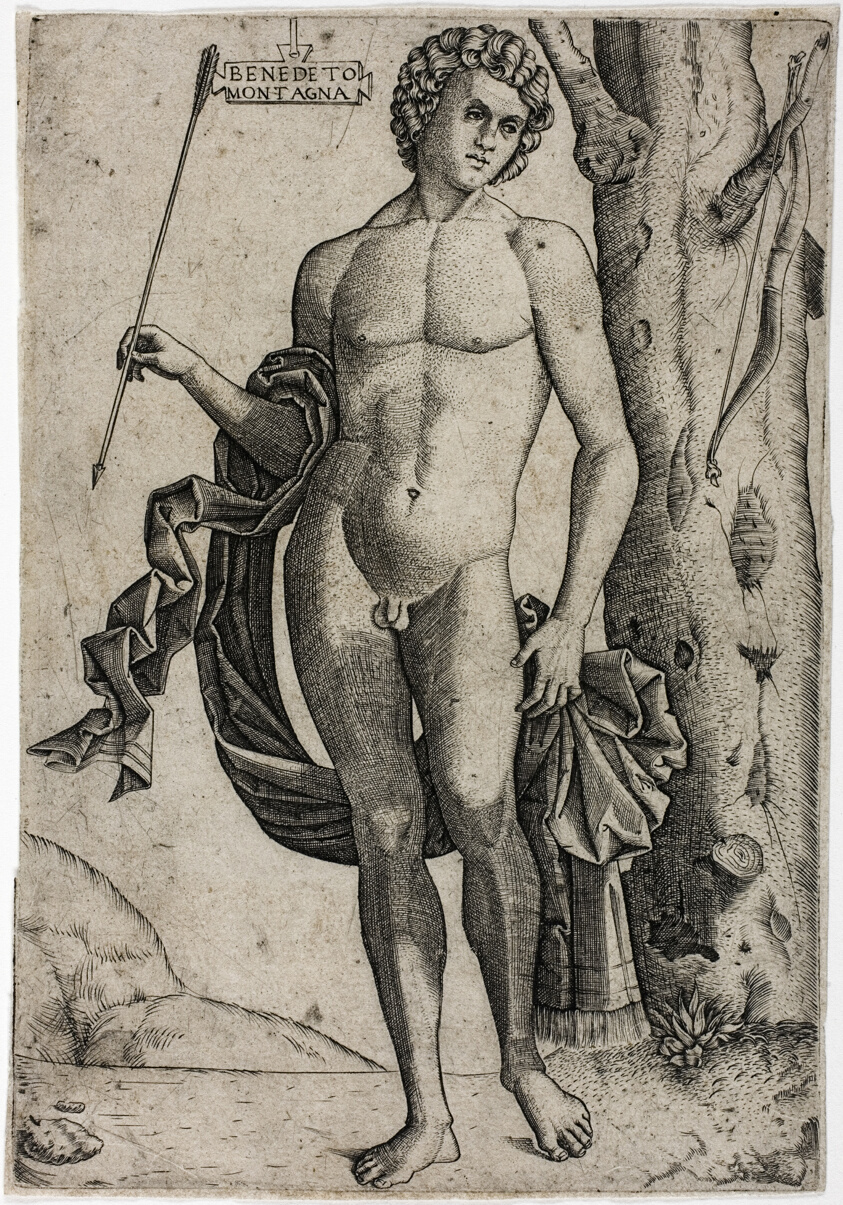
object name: Print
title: A Young Man with an Arrow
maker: Benedetto Montagna (Italian, c. 1480-1556/58)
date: c. 1510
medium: Engraving on paper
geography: Italy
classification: engraving; print; prints and drawing